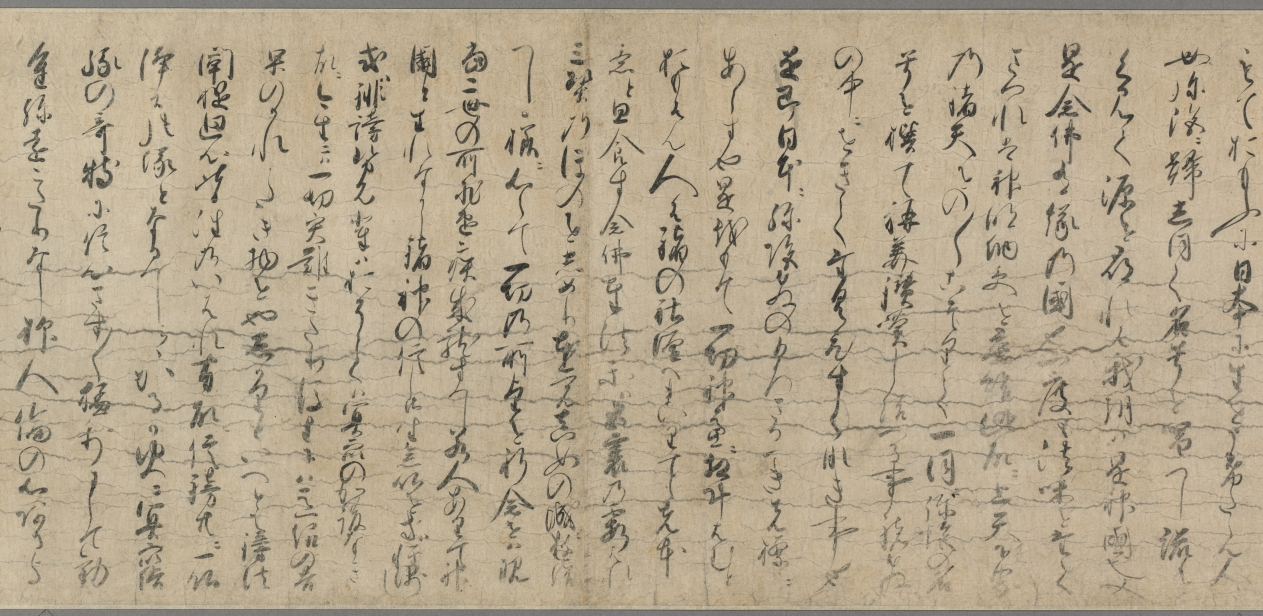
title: The Illustrated Miraculous Origins of the Yūzū Nenbutsu School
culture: Japan, Kamakura period (1185–1333)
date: early 1300s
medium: Handscroll; ink, color, and gold on paper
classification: Painting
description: This painting is the second of a set of two illustrated handscrolls. The first scroll depicts the biography of the Japanese Buddhist monk Ryōnin. This scroll begins with scenes of Ryōnin’s death and relates episodes illustrating the efficacy of following his teachings. Ryōnin asserted the total interconnectedness of all things and the spiritual benefit of chanting the name of the Buddha Amida for one another.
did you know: The other scroll from this two-scroll set belongs to the Art Institute of Chicago.